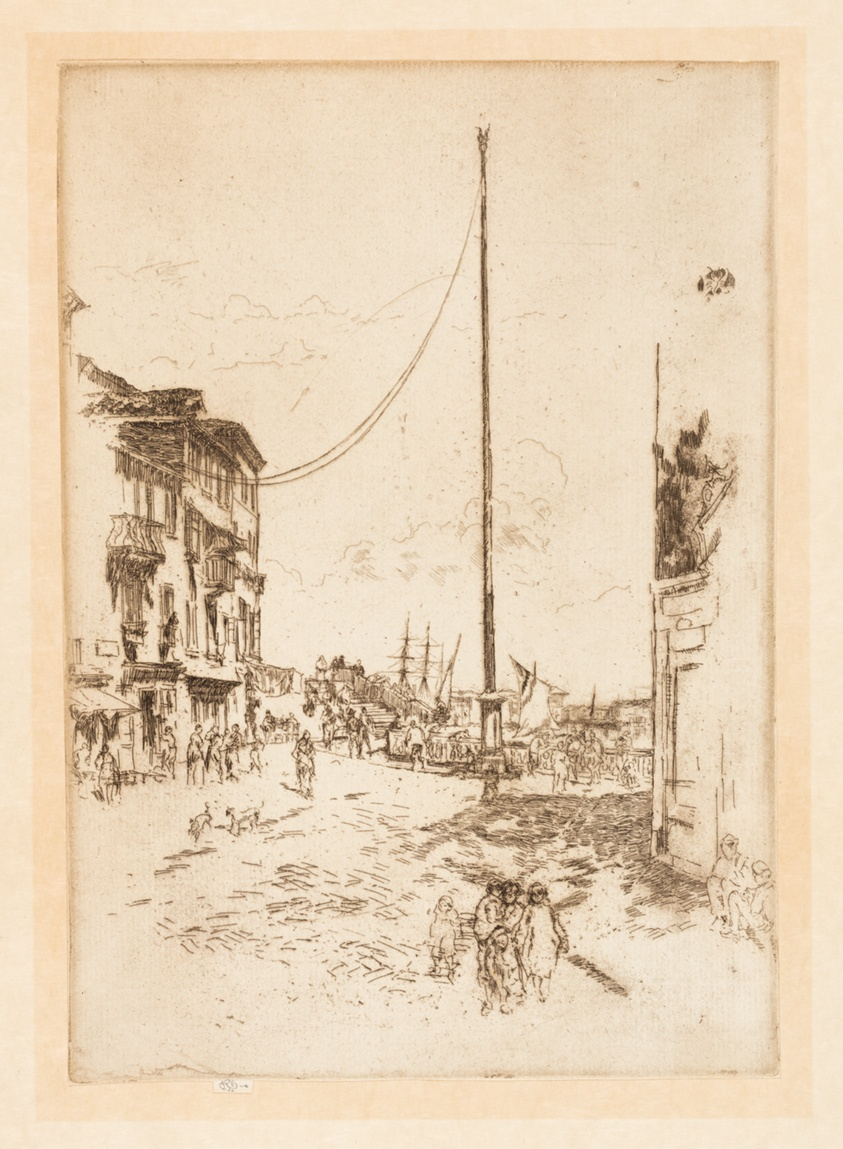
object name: Print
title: The Little Mast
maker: James McNeill Whistler (American, 1834-1903)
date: 1879/80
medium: Etching and drypoint with foul biting in dark brown ink on ivory laid paper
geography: United States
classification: etching; drypoint; print; prints and drawing; foul biting; paper